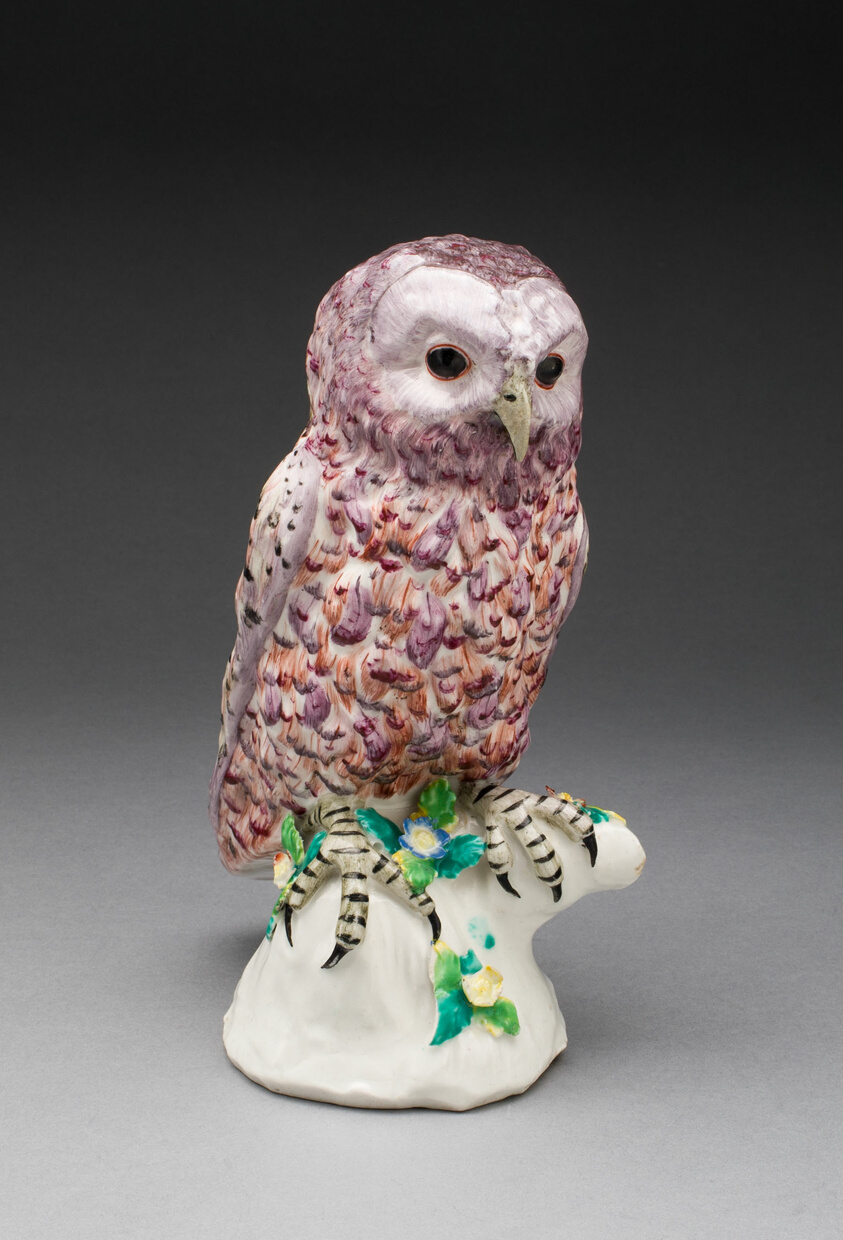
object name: Ceramics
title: Owl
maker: Bow Porcelain Factory (London, England, 1744-1775)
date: c. 1760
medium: Soft-paste porcelain, polychrome enamels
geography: Bow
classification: porcelain; european decorative arts; ceramics